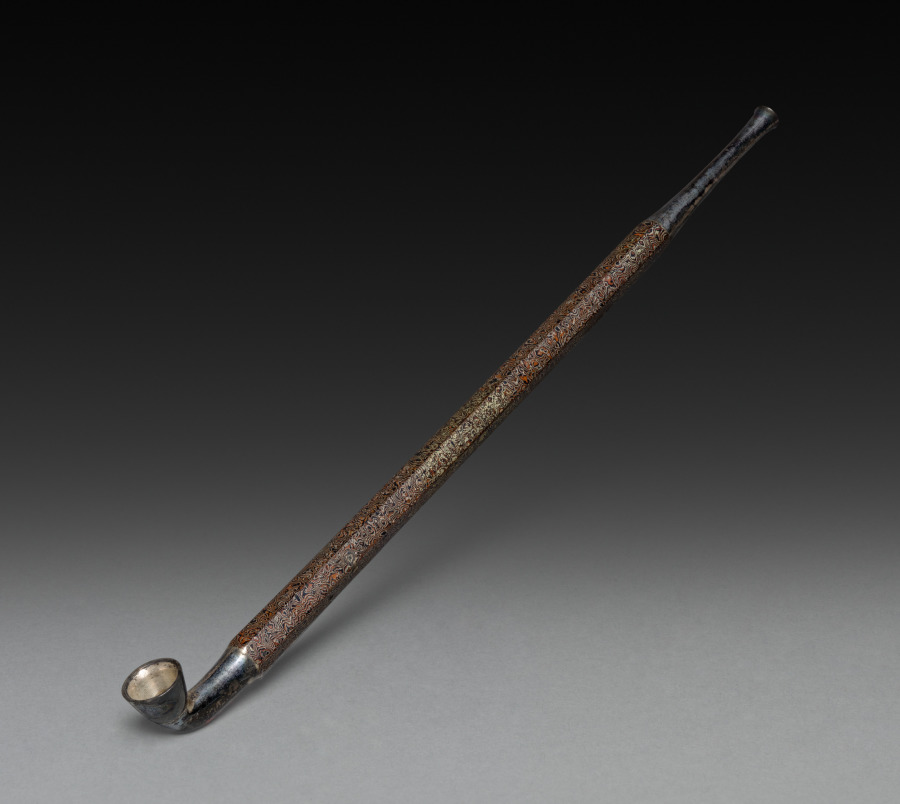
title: Tobacco Pipe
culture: Japan, Edo period (1615–1868)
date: 1700s–mid-1800s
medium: silver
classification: Miscellaneous